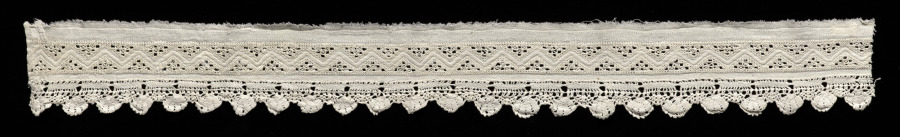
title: Band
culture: Italy, 1800s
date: 1800s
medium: Needle lace (drawnwork) and bobbin lace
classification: Lace